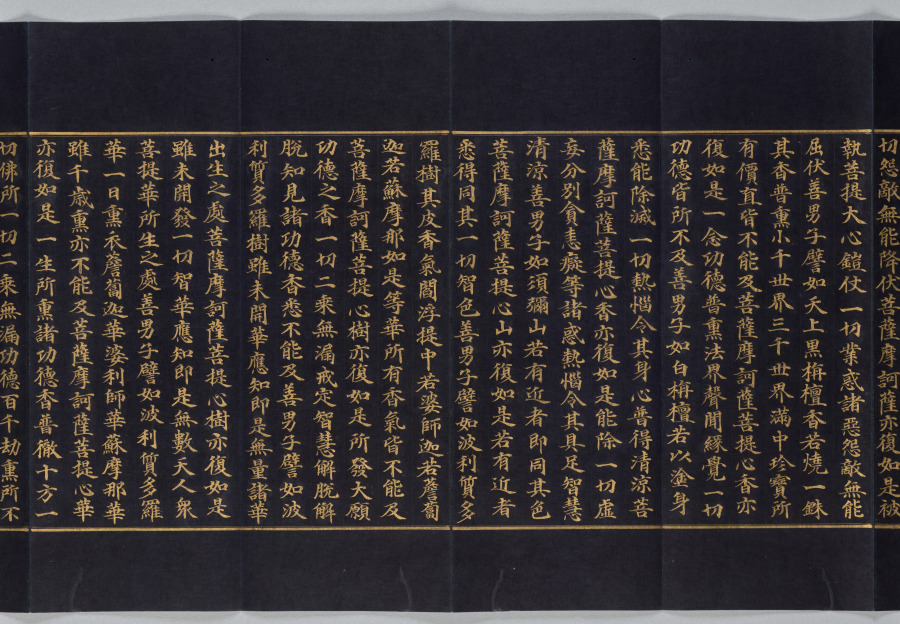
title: Avatamsaka Sutra No. 78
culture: Korea, Goryeo dynasty (918–1392)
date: 1300s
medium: Folded book with illustrated frontispiece; gold and silver on mulberry paper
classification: Bound Volume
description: This illuminated manuscript presents one part of the multivolume sacred text titled Avatamsaka (Flower Garland) sutra. Both the script and the image are rendered in gold ink on the smooth surface of the dark blue, indigo-dyed mulberry paper. This portion of the text, which reads from right to left, describes the encounter of the Buddha of the Future (Maitreya) and the young pilgrim Sudhana. The Buddha gives his words of wisdom to Sudhana, who asks questions about the path toward spiritual awakening. Mixed with ink and glue, the gold has a brilliance that strikingly reflects Sudhana’s ardent quest for understanding the way to reach enlightenment.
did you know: The pristine condition of this manuscript indicates that it was rarely used after its creation, revealing that the act of making a manuscript rather than reading it was the main religious goal.